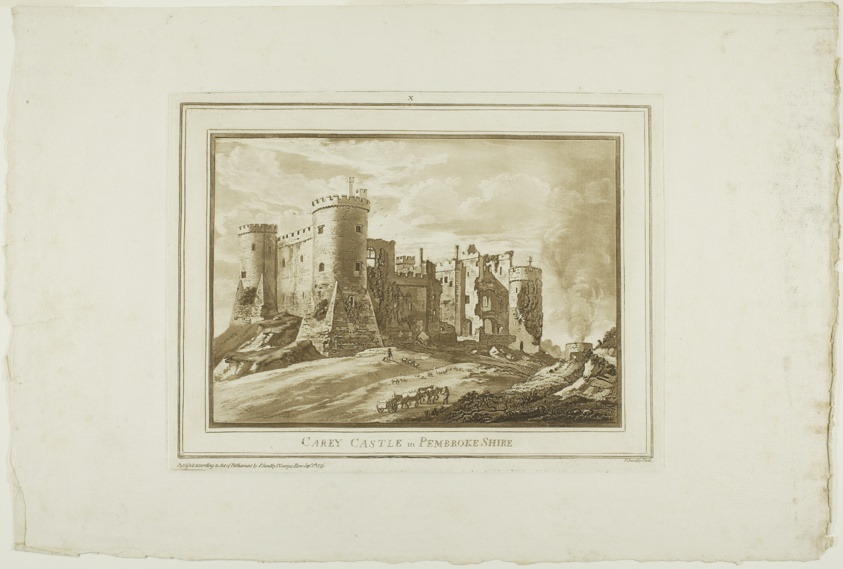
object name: Print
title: Carey Castle in Pembroke Shire, plate ten from Twelve Views in South Wales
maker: Paul Sandby (English, 1731-1809)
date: 1775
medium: Aquatint with etching on ivory laid paper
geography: England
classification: aquatint; print; prints and drawing